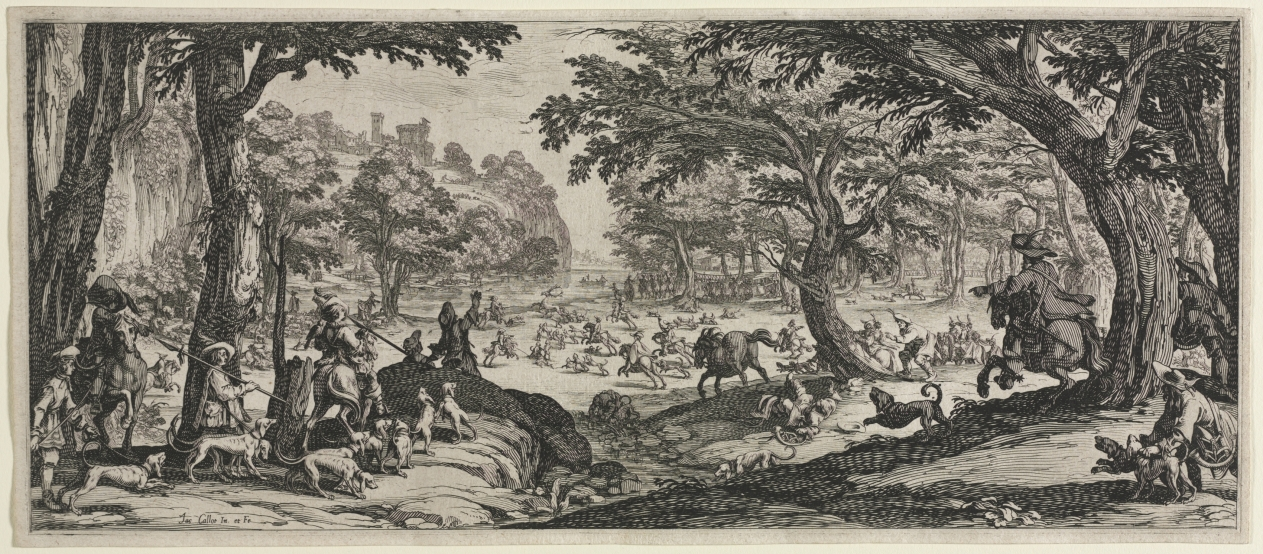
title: The Large Hunt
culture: France, 17th century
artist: Jacques Callot (French, 1592–1635)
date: 1619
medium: etching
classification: Print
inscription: lower left, in plate: Jac Callot In. et Fe ; verso, center left, in graphite: 3-2[sideways] ; VERSO, lower right, in graphite: L353 I/4 ; lower right, in graphite: 35[circled] ; lower right, in graphite: C 37105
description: Jacques Callot (French, 1592-1635) The Large Hunt, 1619 Etching Gift of Margaret Crile Garretson in memory of Hiram Garretson 1970.342 Callot is known for two important inventions in etching. He designed a slanted, oval-shaped, steel-tipped etching tool called an échoppe which is used to imitate the tapering and swelling lines of an engraving. He also developed a hard ground (an acid-resistant coating for etching plates), composed of mastic and linseed oil, that resisted chipping. Callot's work was significantly influenced by theater design. His organization of space, usually into three distinct areas (although there are five in this case)-foreground, middleground, and background-resembles stage sets of the time. In fact, this work was probably inspired by a theater screen painted by Federico Zuccaro in 1565. Like Jacques Bellange, whose works are featured in galleries 109 and 110, Callot was from Lorraine. He was one of the most prolific professional printmakers of the 1600s. Trained as an engraver, he worked in Nancy, France, the Low Countries, and in Florence for Grand Duke Cosimo II de' Medici. His range of subjects was broad-religious scenes, theater and pageants, court life, beggars, and landscapes.